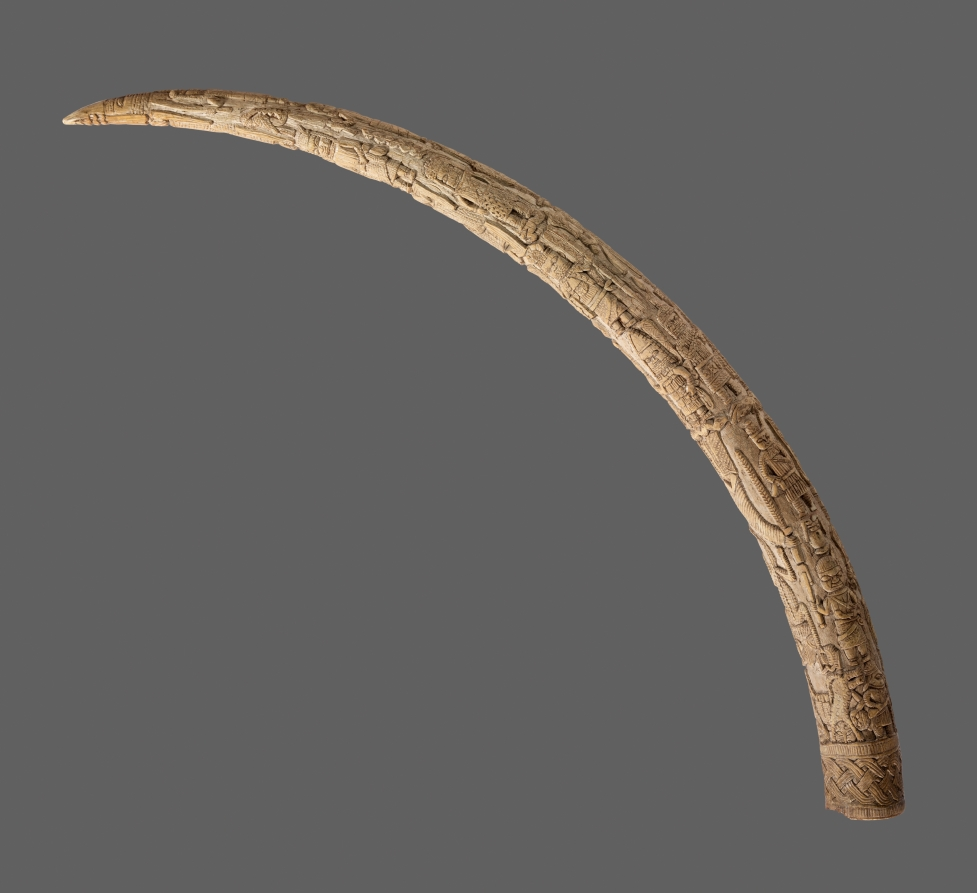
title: Ancestral Altar Tusk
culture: Nigeria, Benin Kingdom, Ẹdo peoples, members of the Igbesanmwan (wood and ivory carvers) guild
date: c. 1820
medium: Elephant ivory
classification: Sculpture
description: Ọba Ọsẹmwẹdẹ commissioned the carving of this tusk to connect with his ancestors and symbolize his strength. It is covered with royal figures wearing elaborate regalia and scenes of power, ritual, and violence. While Benin royal symbols may look similar across centuries, their meanings can shift. Ọsẹmwẹdẹ’s reign was prosperous due to trade with the Dutch; however, 16th-century Portuguese men are carved on the lower tusk. By the 1800s they represented any European traders. This tusk’s surface likely became worn and cracked from frequent washing, bleaching, and the applying of a white clay (orhue) linked to peace, purity, and prosperity.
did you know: Originally, this carved tusk was placed on an ancestral altar as part of an ensemble of objects made to memorialize a deceased Ọba (ruler).